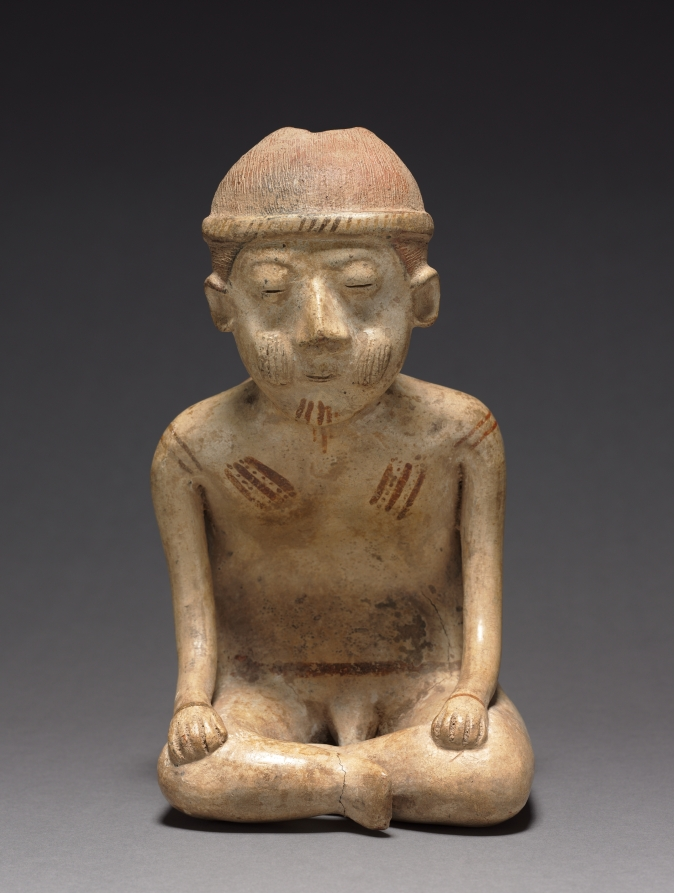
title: Seated Male Figure with Backrest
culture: Mexico, Nayarit, Chinesco style, Type E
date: 100 BCE–300 CE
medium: pottery with burnished cream and red slips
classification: Sculpture